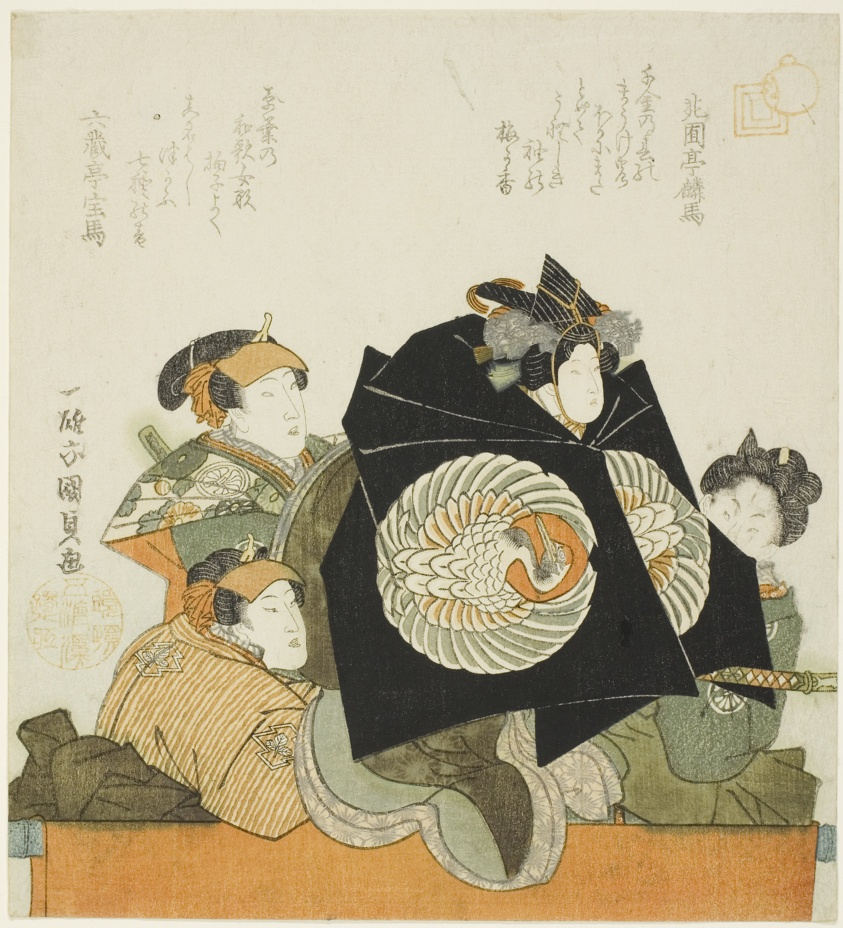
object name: Print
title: Three actors and a puppet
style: Japanese (culture or style)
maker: Utagawa Kunisada I (Toyokuni III) (Japanese, 1786-1864)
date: late 1810s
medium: Color woodblock print; shikishiban, surimono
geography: Japan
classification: woodblock print; print; asian art